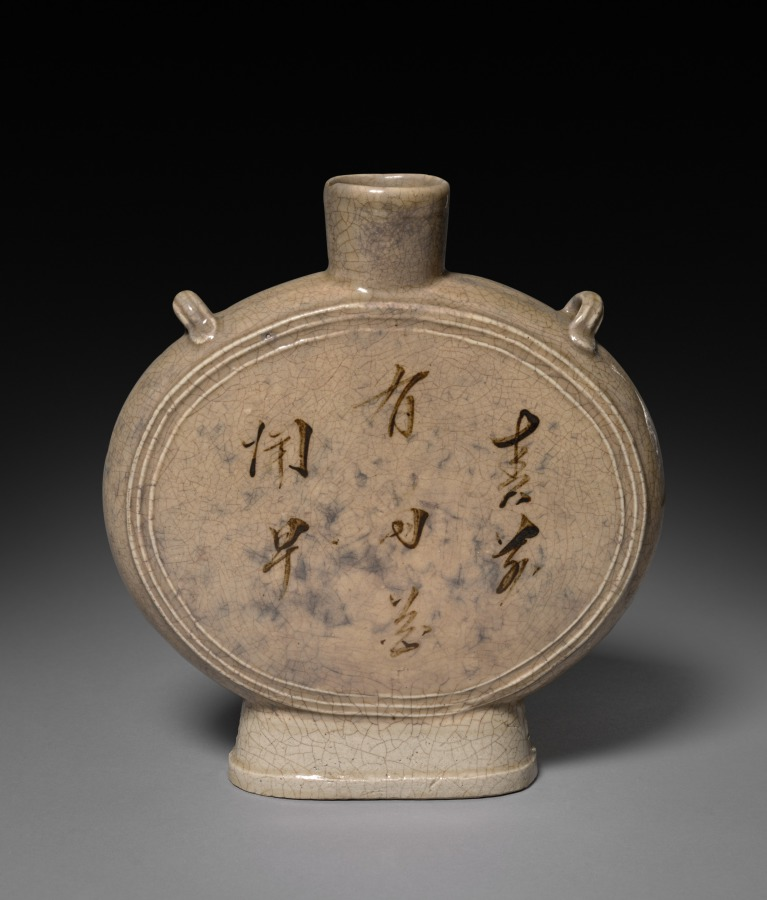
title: Pilgrim Bottle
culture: China, Ming dynasty (1368–1644)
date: 1368–1644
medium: porcelain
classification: Ceramic